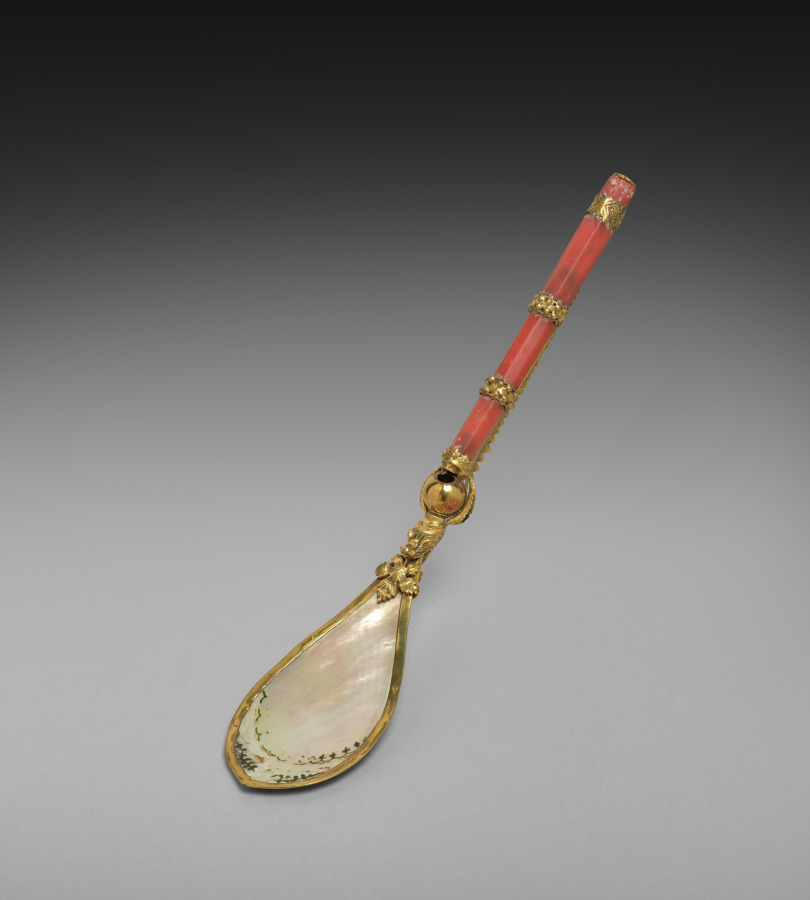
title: Spoon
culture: Italy, Venice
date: c. 1500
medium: enameled shell and coral, gilt-silver mounts; detachable pick with dragon's head finial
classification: Metalwork